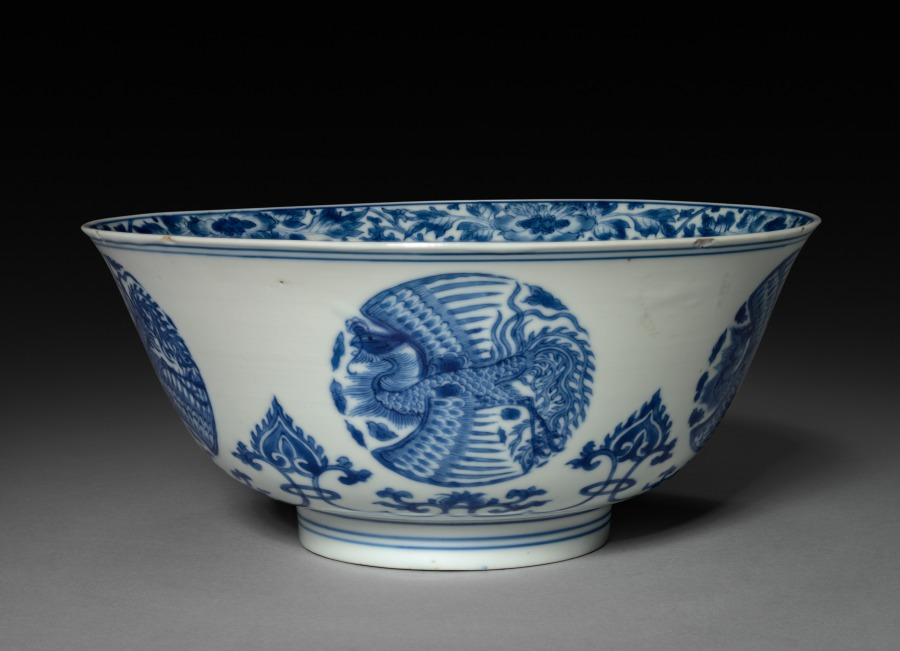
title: Bowl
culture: China, Qing dynasty (1644-1911), Kangxi reign (1661-1722)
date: 1662–1722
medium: porcelain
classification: Ceramic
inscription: 大明嘉靖年製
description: The apocryphal inscription in a double circle on the base reads "made in the Ming dynasty, Jiajing period," but the bowl was made during the reign of the Qing emperor Kangxi.